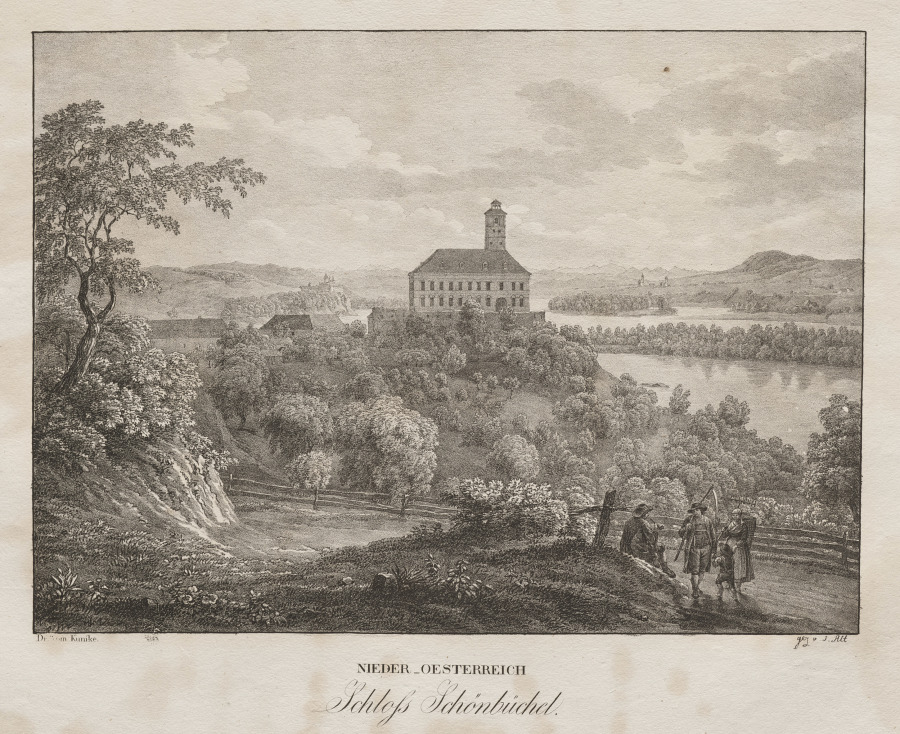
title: Nieder-oesterreich, Schloss Schöbüchel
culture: Austria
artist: Jakob Alt (Austrian, 1789–1872)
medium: lithograph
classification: Print